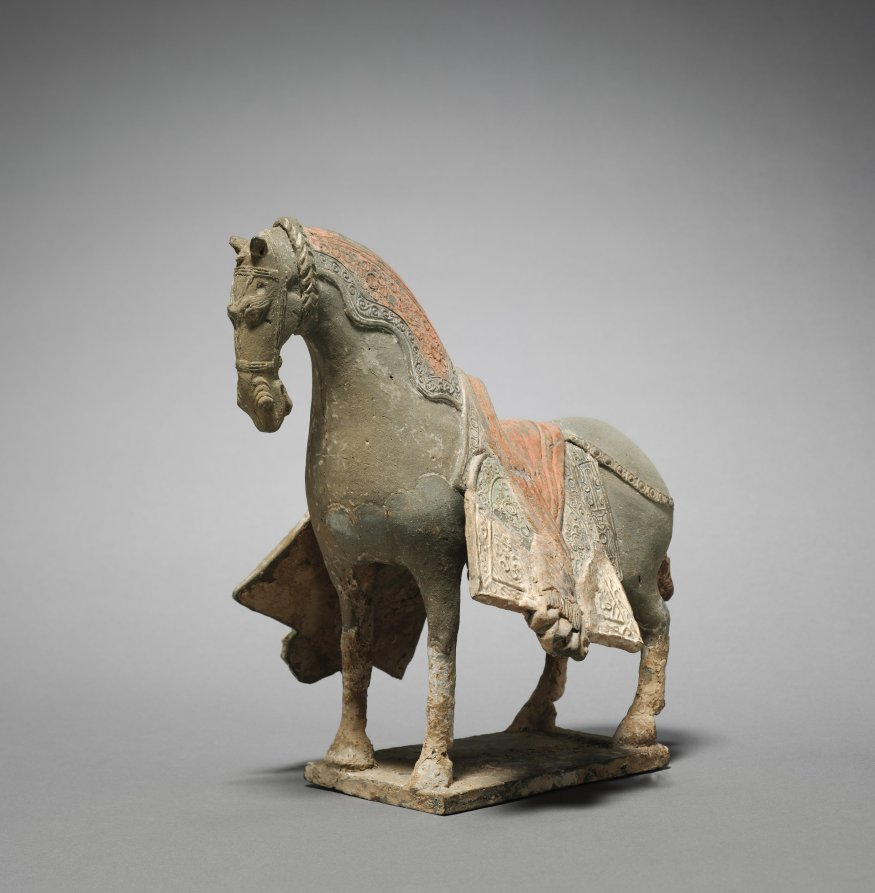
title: Mortuary Horse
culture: China, Six Dynasties period (317-581), Northern Wei dynasty (386-534)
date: c. 525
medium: dark buff earthenware with polychrome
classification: Sculpture